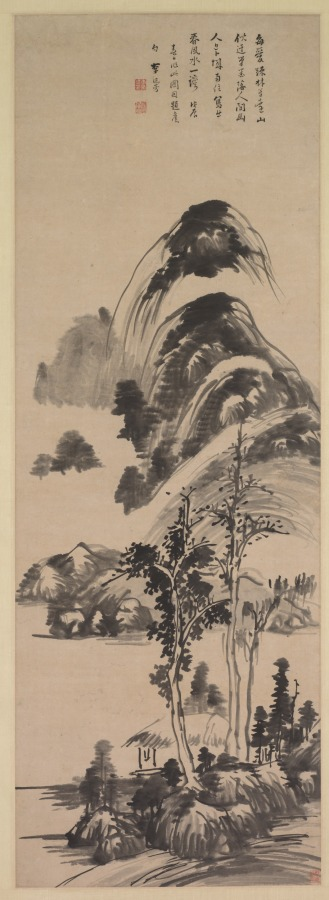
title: Thin Forest and Distant Mountains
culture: China, Ming dynasty (1368–1644)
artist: Li Liufang (Chinese, 1575–1629)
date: 1628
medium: hanging scroll, ink on paper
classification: Painting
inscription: Artist's inscription, signature, and 2 seals: Thin forest and distant mountains have always attracted me; As if they were from the brush and ink of Ni Tsan, left behind by the master in this mortal world. Now that the quiet recluse has chosen to live in the South of the City. He paints the spring breeze---over a curve of the river. In the spring day of the wu-ch'en year [1628] I made this painting and attached an old poem. Li Liu-fang [seals] Li Liu-fang-yin; Chang-heng shih. trans. WKH 1 additional seal of Chung Wen-ming (17th c.).